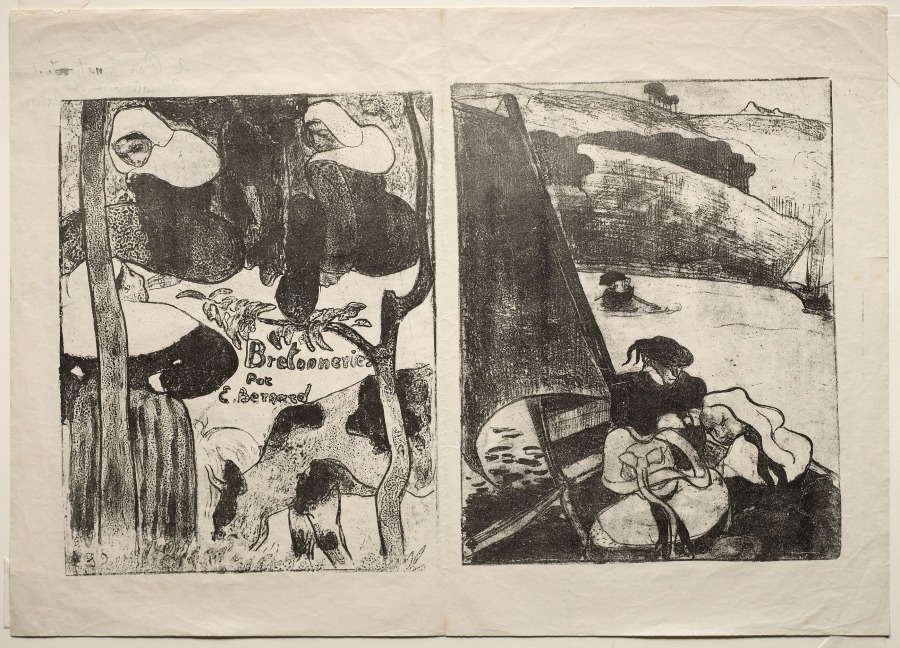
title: Les Bretonneries: Title Page (Page de Titre) and The Return from the Pilgrimage (Le Retour du Pardon)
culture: France, 19th century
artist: Émile Bernard (French, 1868–1941)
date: 1889, printed 1896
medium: zincograph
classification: Print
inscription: inscribed on verso of title page: A Don Ignatio Zuloago/ Amicalement et/ avec Grattitude artistique/ Emile Bernard/ Seville 1897